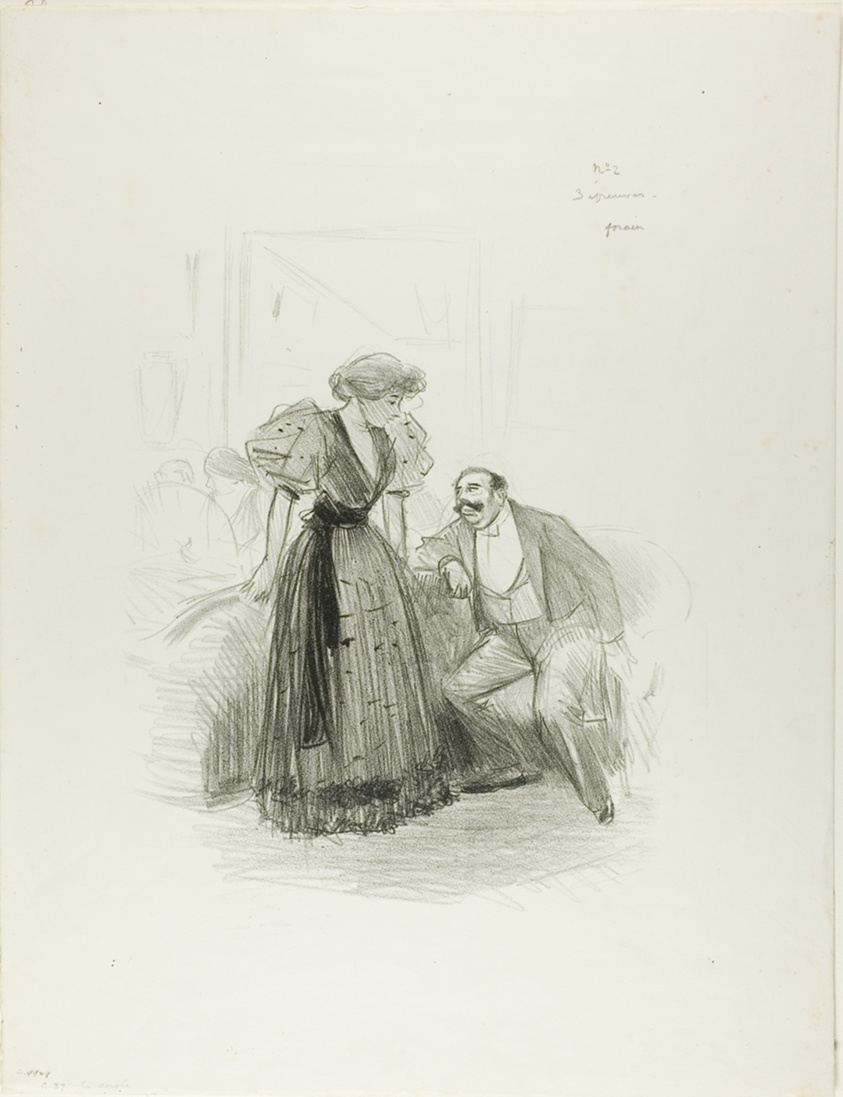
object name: Print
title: At an Evening Party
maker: Jean Louis Forain (French, 1852-1931)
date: c. 1896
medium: Lithograph on ivory vellum paper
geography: France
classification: lithograph; print; prints and drawing